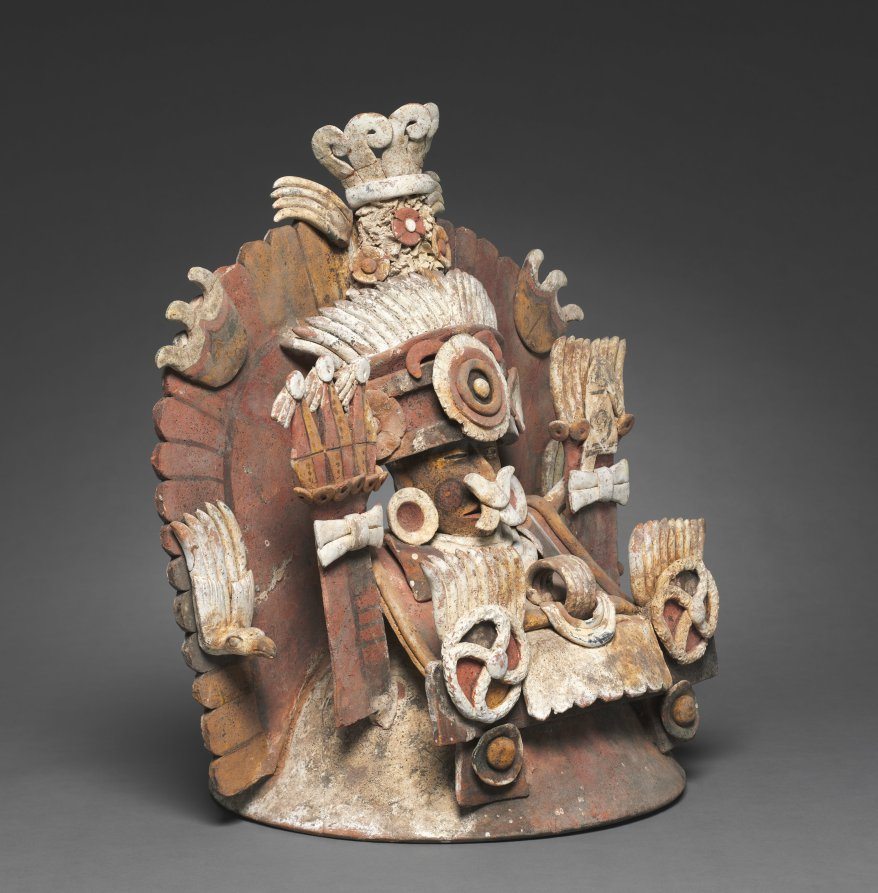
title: Incense-burner Cover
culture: Guatemala, Escuintla Region, early 6th Century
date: c. 500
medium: earthenware with slip and pigments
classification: Ceramic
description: This elaborate clay construction served as the cover and chimney of a basin used to burn copal incense. Although probably manufactured in what is now Guatemala, the form and fabrication are based on examples from Teotihuacan in central Mexico, hundreds of miles away. Intensive trade between the two regions, or even a Teotihuacan colony in Guatemala seems likely. The masked, dressed, and ornamented moundlike form probably represents a mortuary bundle or a cult image.